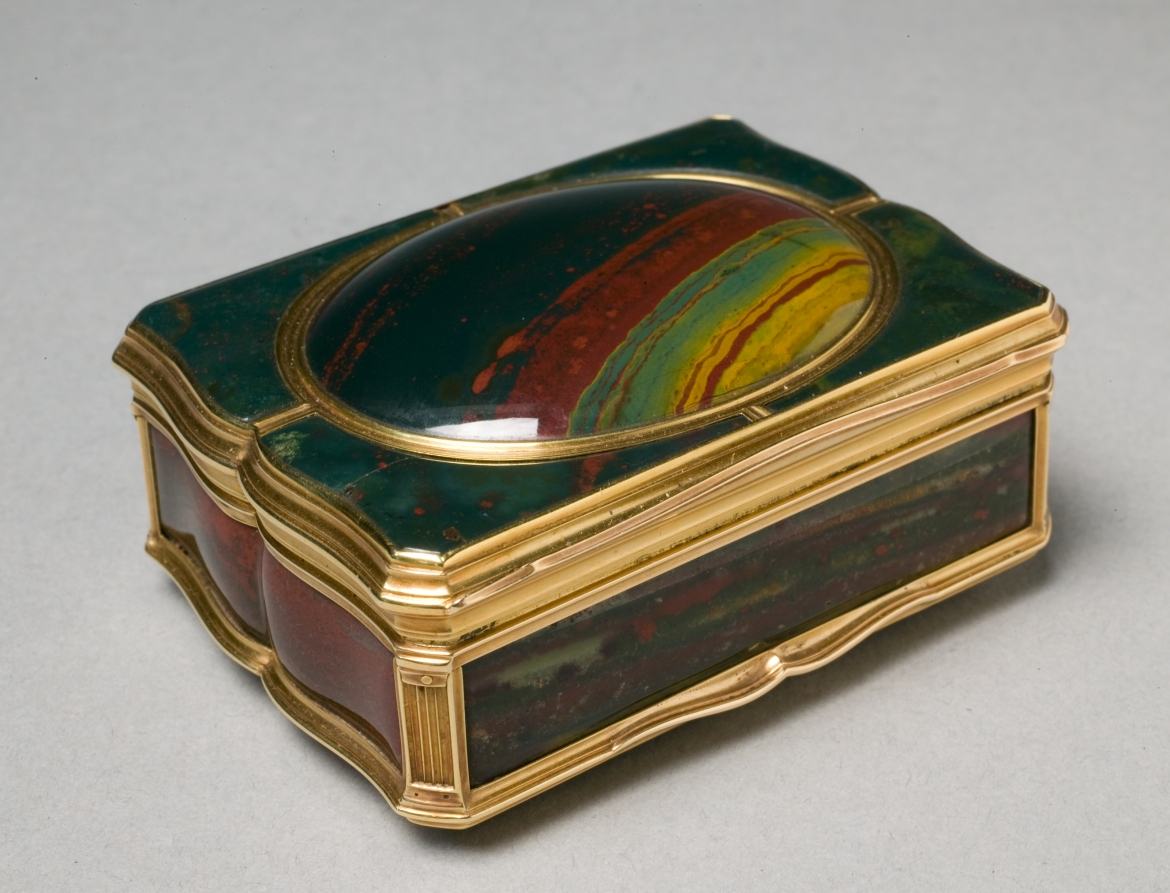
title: Snuff Box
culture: France, Paris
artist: Noel Hardivilliers (French)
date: 1732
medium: hardstone, jasper panels, gold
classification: Miscellaneous